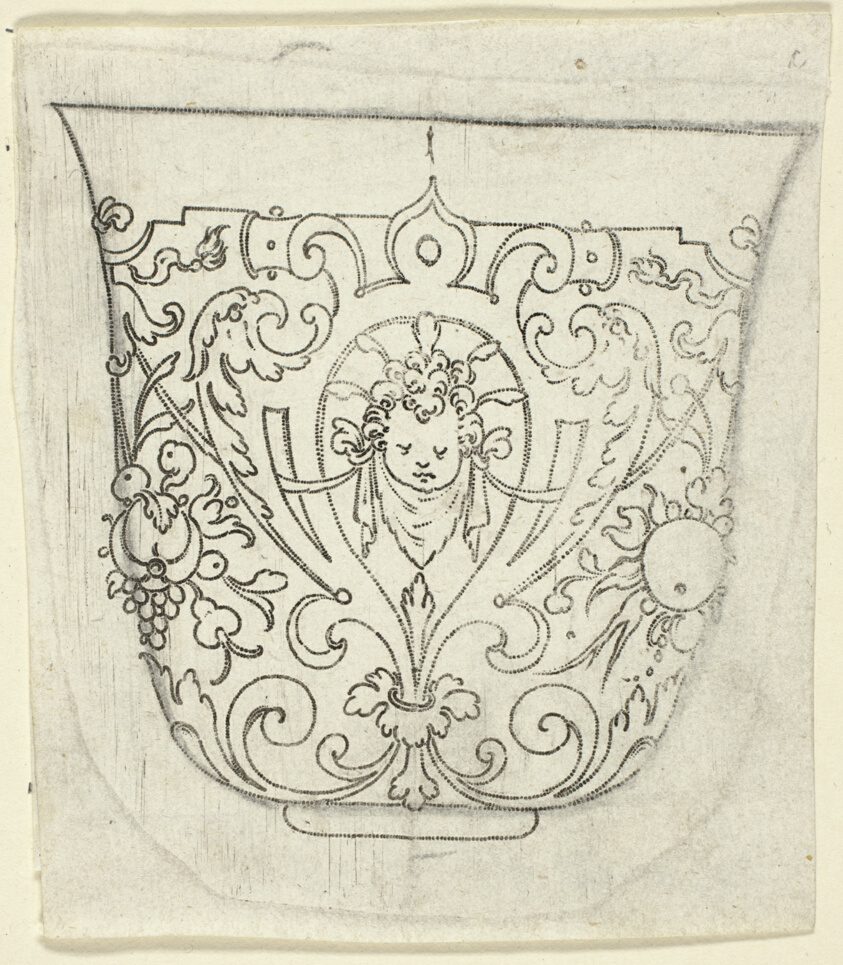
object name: Print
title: Plate 1, from XX Stuck zum (ornamental designs for goblets and beakers)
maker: Master A.P. (German, active early 17th century)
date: 1601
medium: Punch engraving in black with traces of graphite on ivory laid paper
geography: Germany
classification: engraving; print; prints and drawing